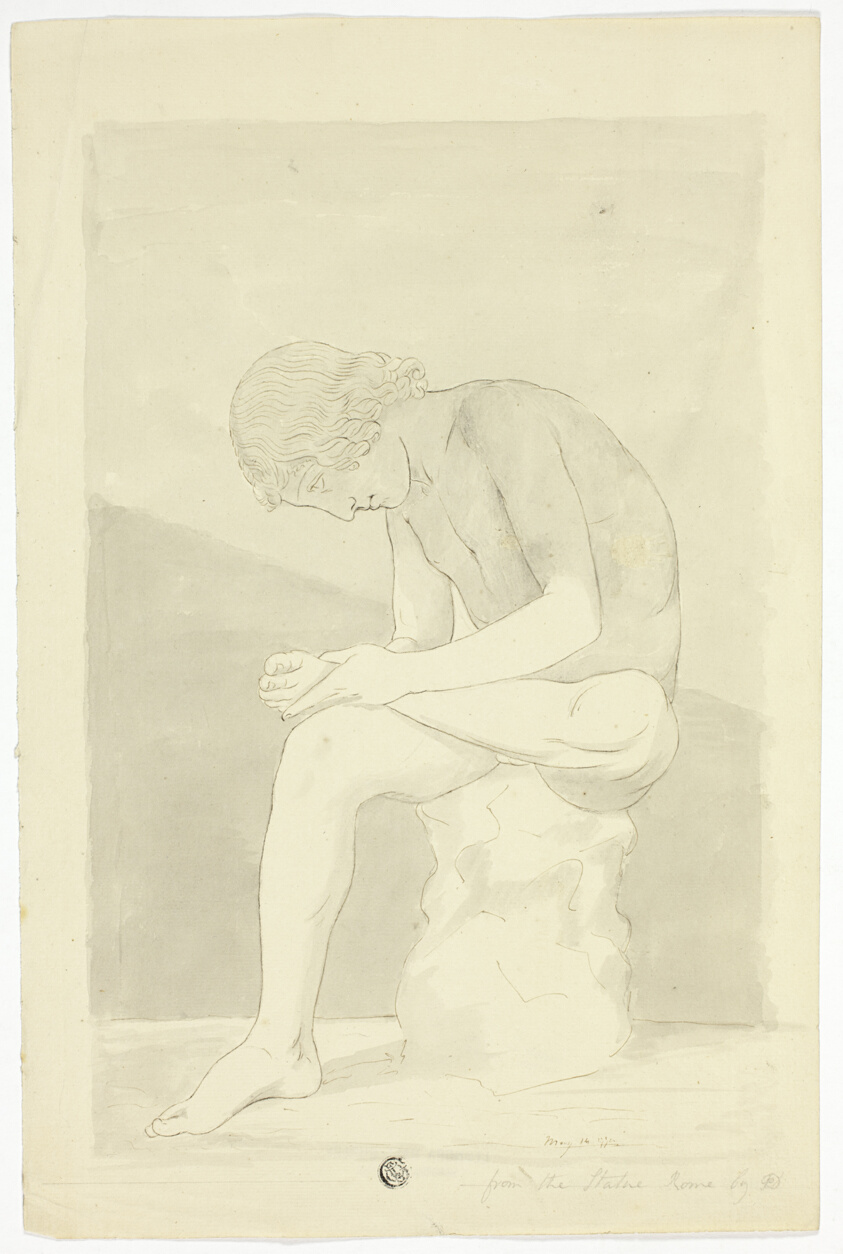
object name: Drawing and Watercolor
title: The Thorn-Picker (Lo Spinario)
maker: John Downman (English, 1750-1824)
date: 1772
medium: Pen and brown ink, with brush and gray wash, over touches of charcoal, on cream laid paper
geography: England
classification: pen and ink drawings; paper; drawings (visual works); prints and drawing